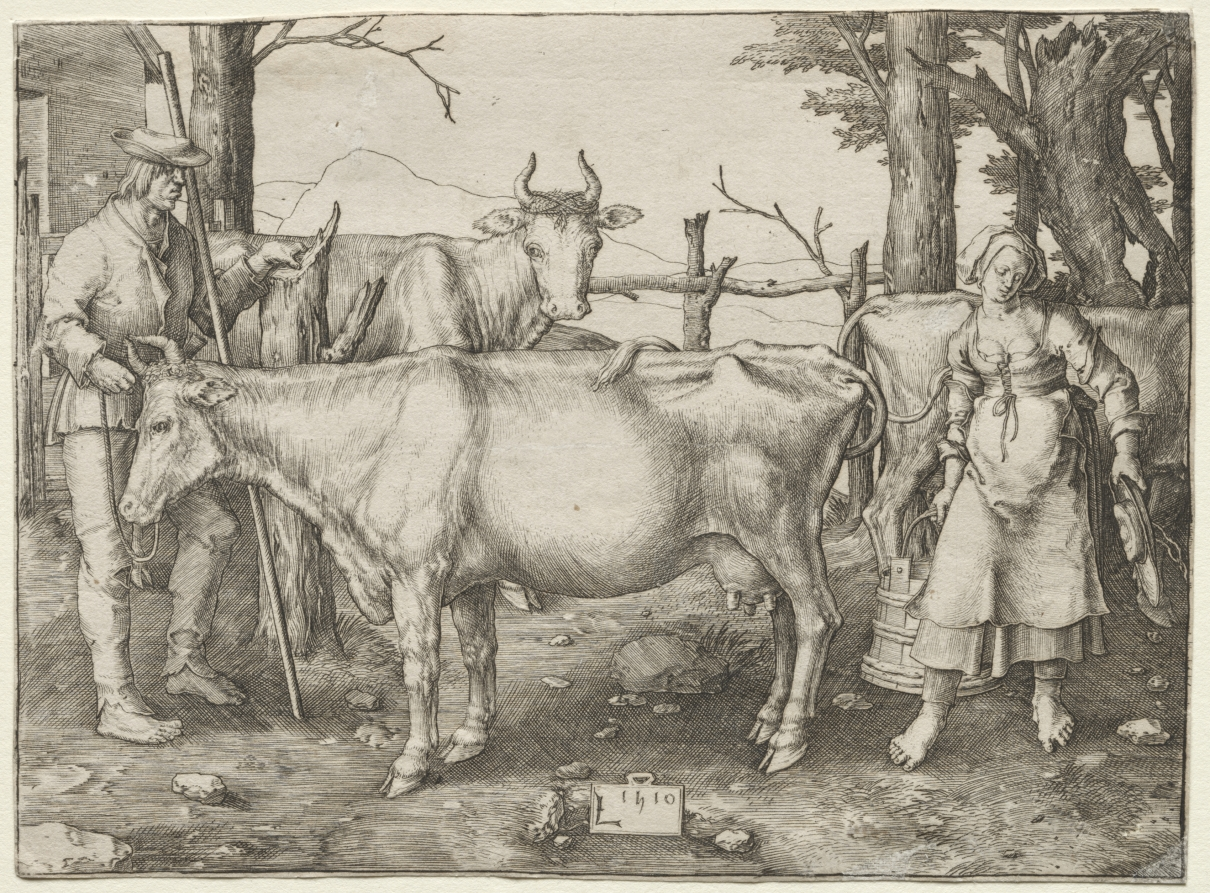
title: The Milkmaid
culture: Netherlands, 16th century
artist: Lucas van Leyden (Netherlandish, 1494–about 1533)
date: 1510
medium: engraving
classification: Print